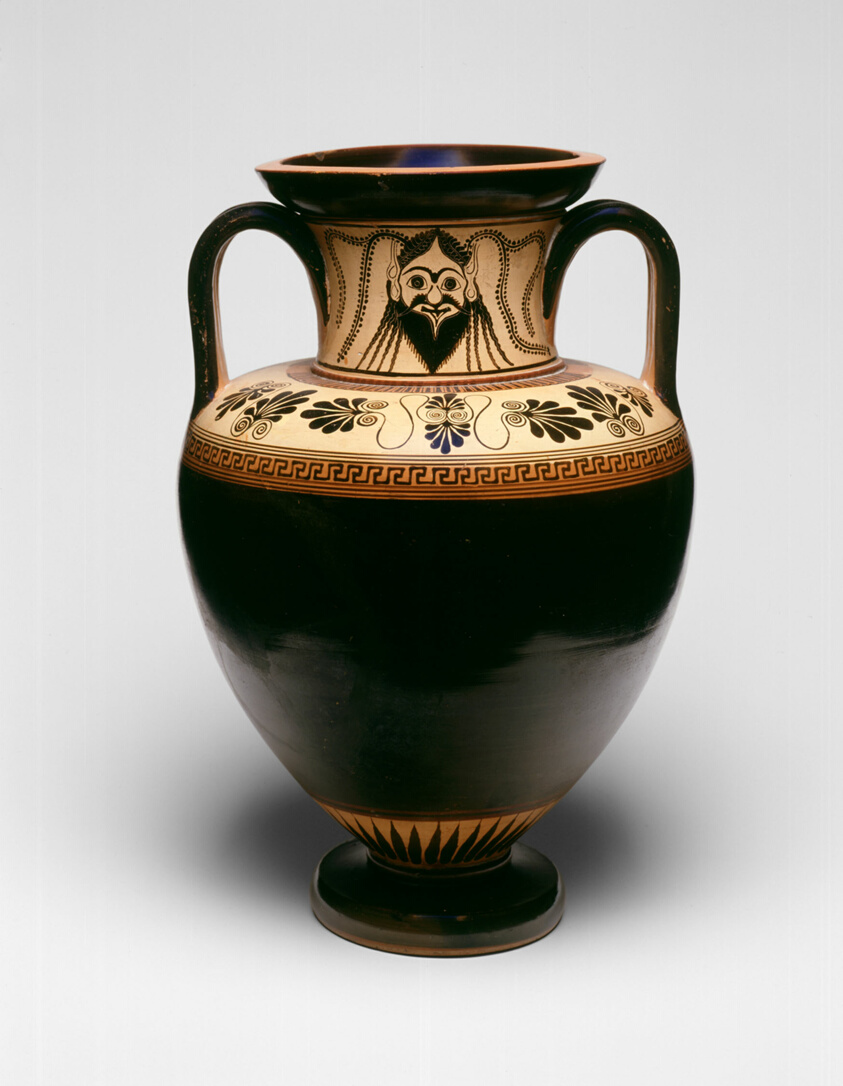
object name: Vessel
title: Amphora (Storage Jar)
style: archaic (greek), attic, black-figure, ancient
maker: Close to the style of the Antimenes Painter; Greek; Athens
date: 530-520 BCE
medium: terracotta, black-figure on white-ground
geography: Athens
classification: vessel; earthenware; ceramics; ancient art; container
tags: mythology, dining, drinking